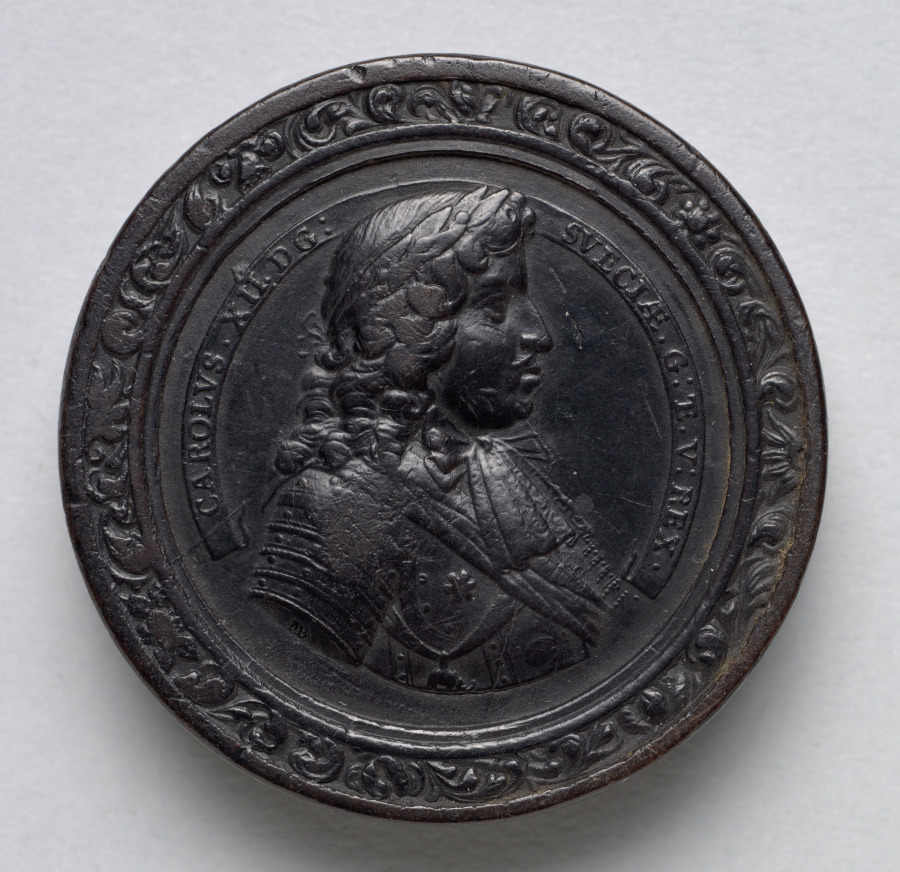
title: Gaming Piece (obverse)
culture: Germany, late 17th-early 18th Century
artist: Martin Brunner (German, 1659–1725)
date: c.1700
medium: wood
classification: Furniture and woodwork